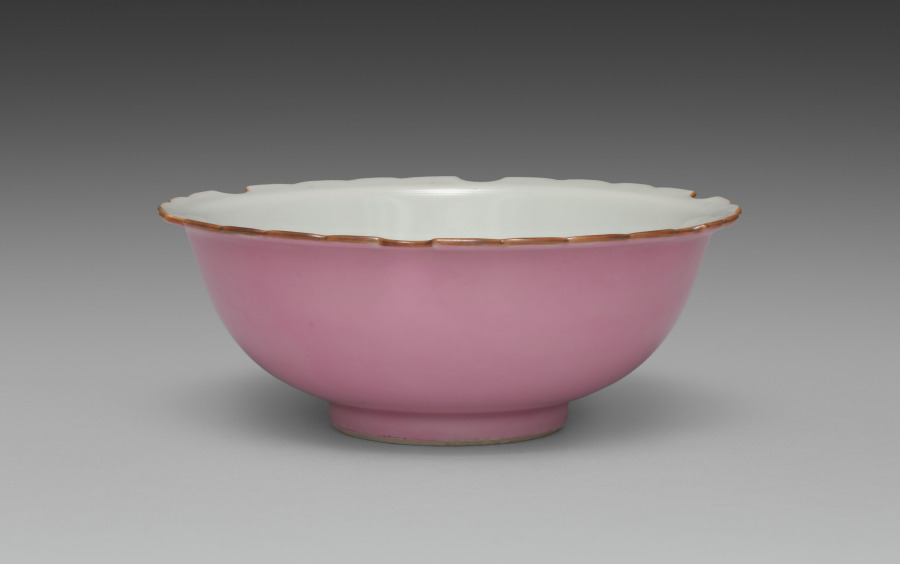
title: Dish from Snow-Flake Side Dishes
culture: Japan, Meiji period (1868–1912)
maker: Seifū Yohei III (Japanese, 1851–1914)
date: 1893–1914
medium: One from a set of six porcelain dishes; porcelain with lobed rims and pink glaze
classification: Ceramic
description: According to the box lid, this set of six side dishes, or mukōzuke, are “snow-flower style” (sekkashiki), having mouths shaped like snowflakes. Their mouths, which have six lobes and scalloped edges, are traced with brown iron oxide at the rim. The outside of each bowl is glazed with a very bright pink over the basin and foot, and the inside is left white. From directly above, one sees a snowflake-like shape, and from the side, they seem to float above a rosy ground.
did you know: The box for this set of dishes has an inscription on the side noting that they were for a person with the family name Nakamoto.